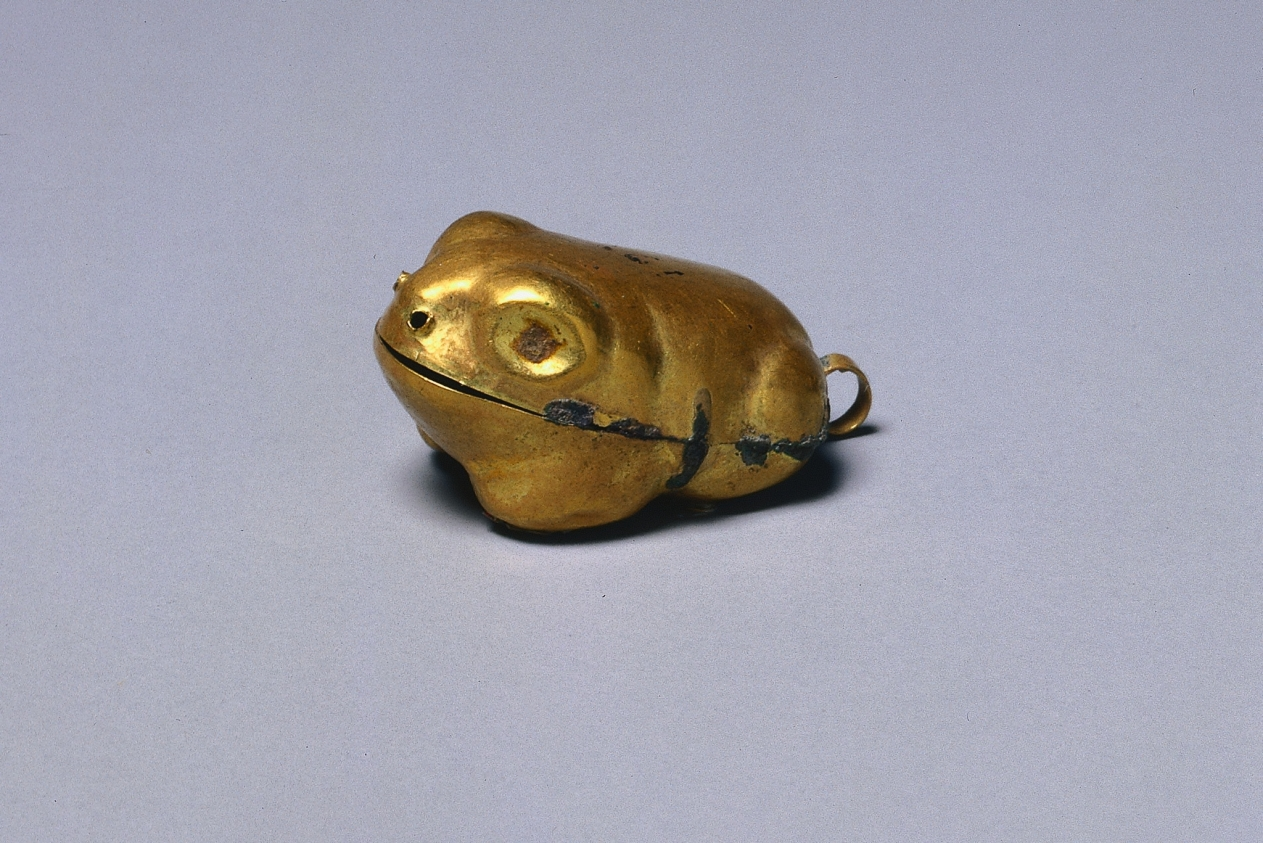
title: Frog Pendant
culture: Peru, Moche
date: 200–700 CE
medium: gold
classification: Metalwork